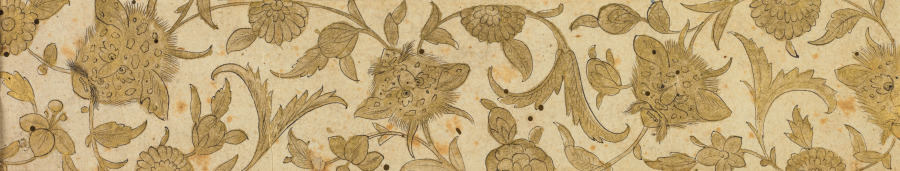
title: From the Farhang-i Jahangiri (Persian-language Dictionary) compiled by Mir Jamal al-Din Husayn Inju of Shiraz (Persian, d. 1626)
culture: Mughal India, court of Jahangir (1605–1627)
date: 1607–8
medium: Gum tempera, ink, and gold on paper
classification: Painting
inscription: Recto: “kuyesteh” (misspelling of “kunisteh,” meaning two halves of the buttocks) to “Gur” (name of a people in India); Verso: “Gur” to “Gush” (morning east breeze, zephyr)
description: Farhang-i Jahāngīrī, one of the most complete and authoritative dictionaries of the Persian language, was compiled by Mir Jamal al-Din Husayn Inju. It took him 12 years to compile over 9,000 words with definitions and examples from verses by Persian poets. He was born in Shiraz, Iran, but lived most of his life in Agra, India, so the dictionary was named honor of the Mughal emperor Jahangir, who reigned from 1605 to 1627.